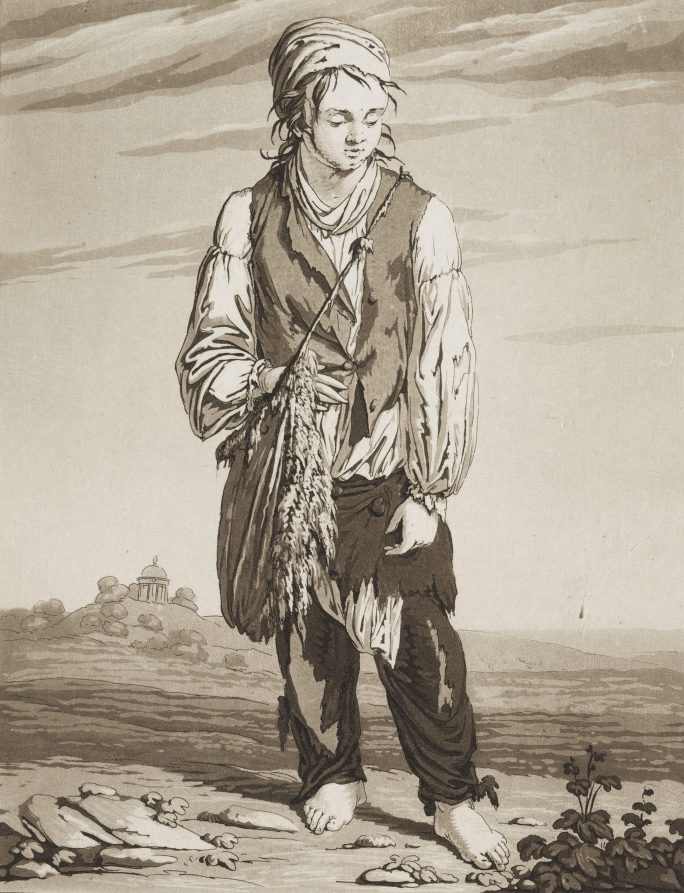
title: The Young Beggars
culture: Germany, late 18th-early 19th century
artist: Karl Ludwig Bernhard Buchhorn (German, 1770–1856)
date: c. 1800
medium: aquatint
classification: Print